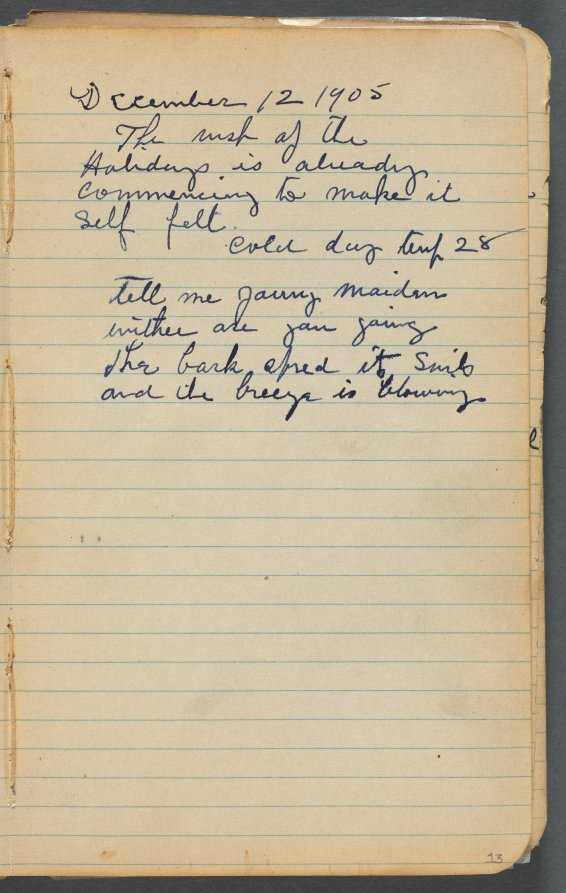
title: Sketchbook, page 013: Notes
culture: America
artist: Maurice Prendergast (American, born Newfoundland [now Canada], 1858–1924)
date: 1905–10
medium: graphite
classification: Bound Volume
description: This sketchbook contains 69 pages of drawings, a diary largely devoted to the state of the artist's health, and a three-page discourse on the nature of genius and ideas.